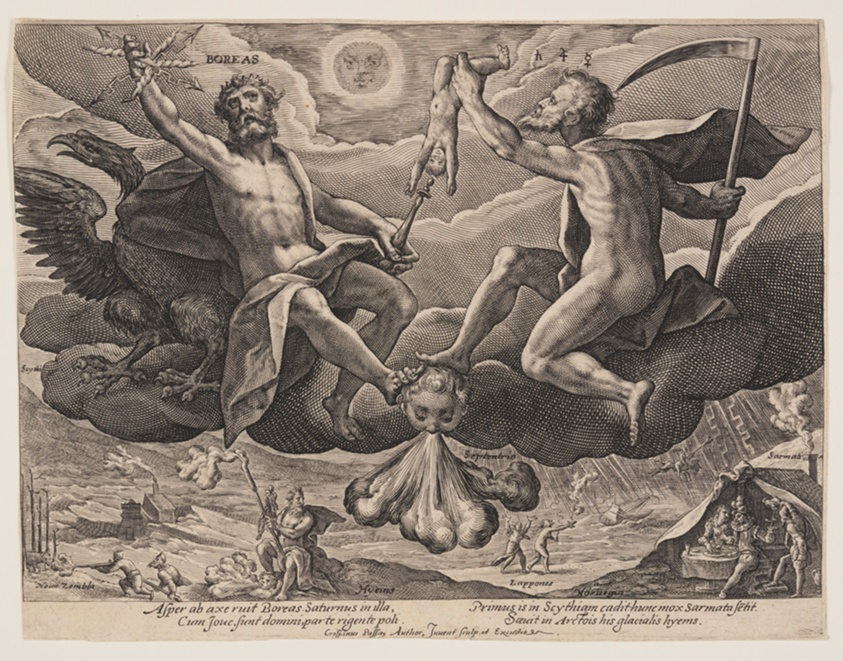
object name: Print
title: Boreas, from The Winds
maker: Crispijn van de Passe I; (Dutch, c. 1565–1637)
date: c. 1603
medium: Engraving on ivory laid paper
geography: Netherlands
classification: engraving; paper; print; prints and drawing